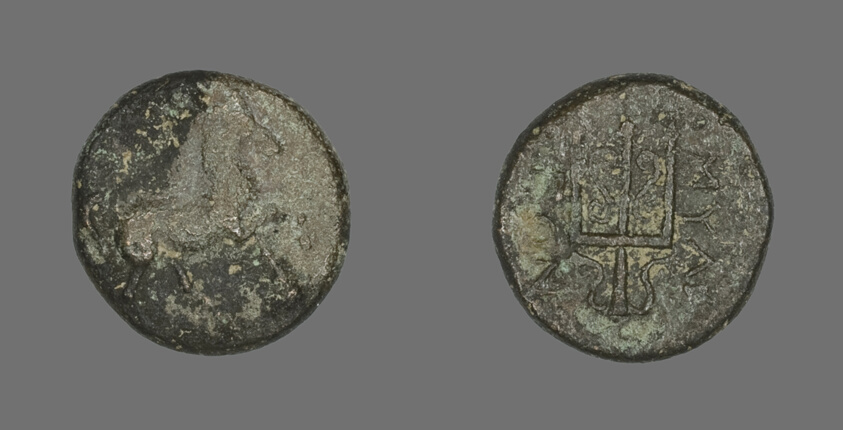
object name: Coin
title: Coin Depicting a Horse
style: greek, ancient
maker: Greek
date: 2nd century BCE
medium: Bronze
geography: Ancient Greece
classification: coin; ancient art